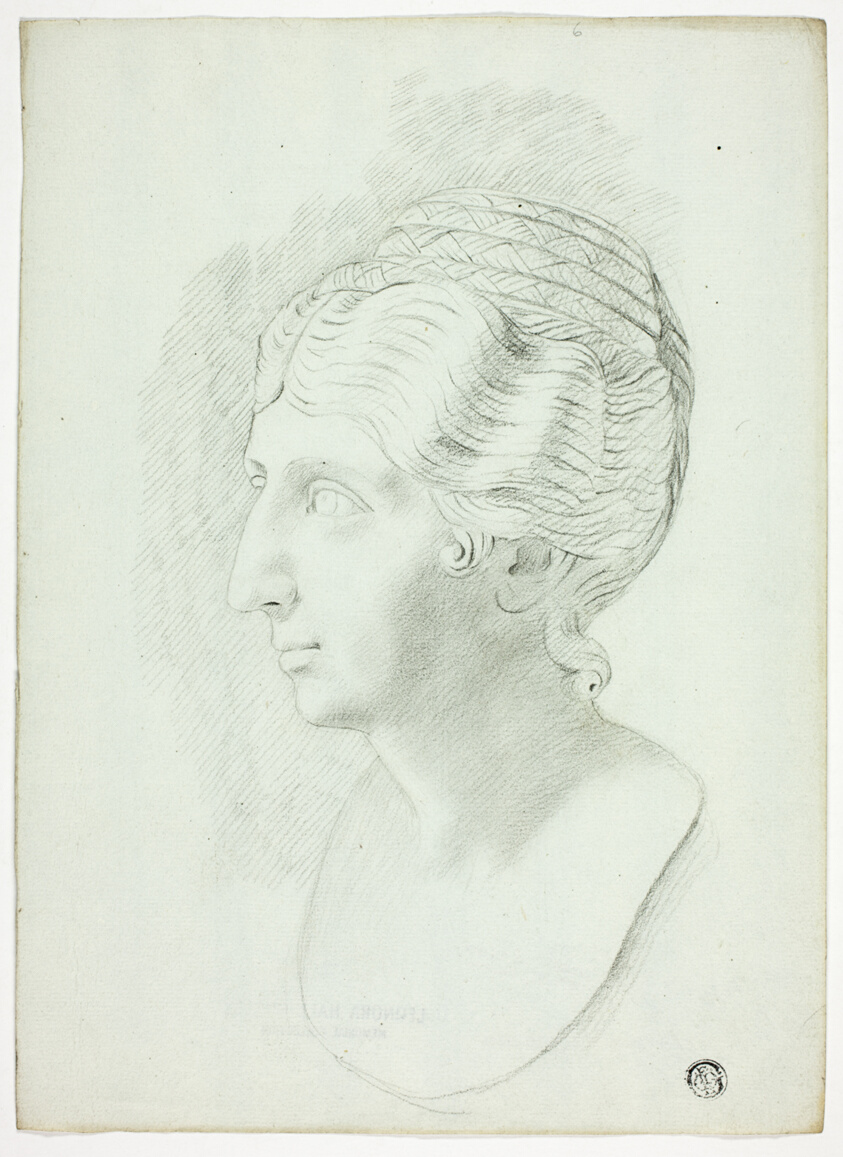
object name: Drawing and Watercolor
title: Bust of Roman Matron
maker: John Downman (English, 1750-1824)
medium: Charcoal, with stumping, on pale blue laid paper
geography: England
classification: charcoal; paper; drawings (visual works); prints and drawing